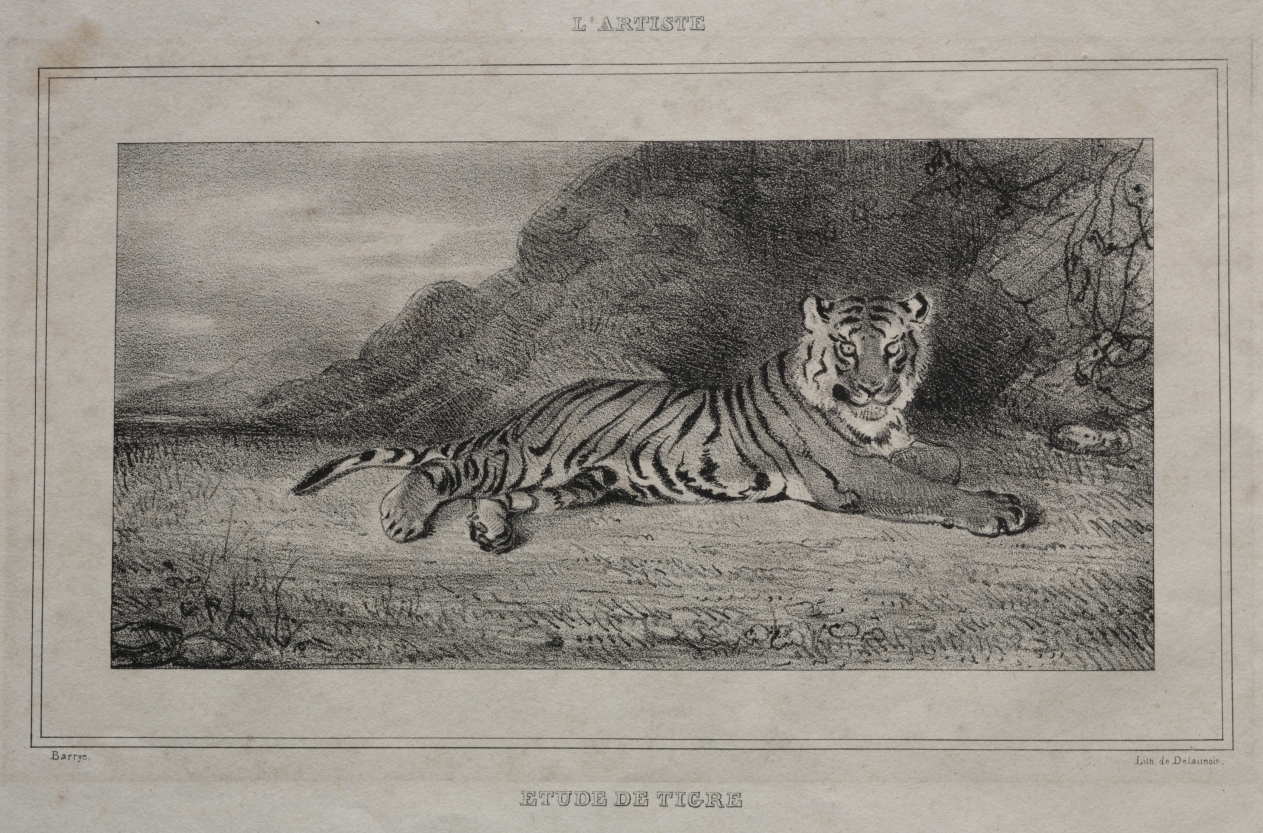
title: Study of a Tiger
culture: France, 19th century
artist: Antoine-Louis Barye (French, 1796–1875)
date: 1832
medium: lithograph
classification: Print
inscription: lower left, on stone: Barrye upper center: L'Artiste lower center: Etude de tigre